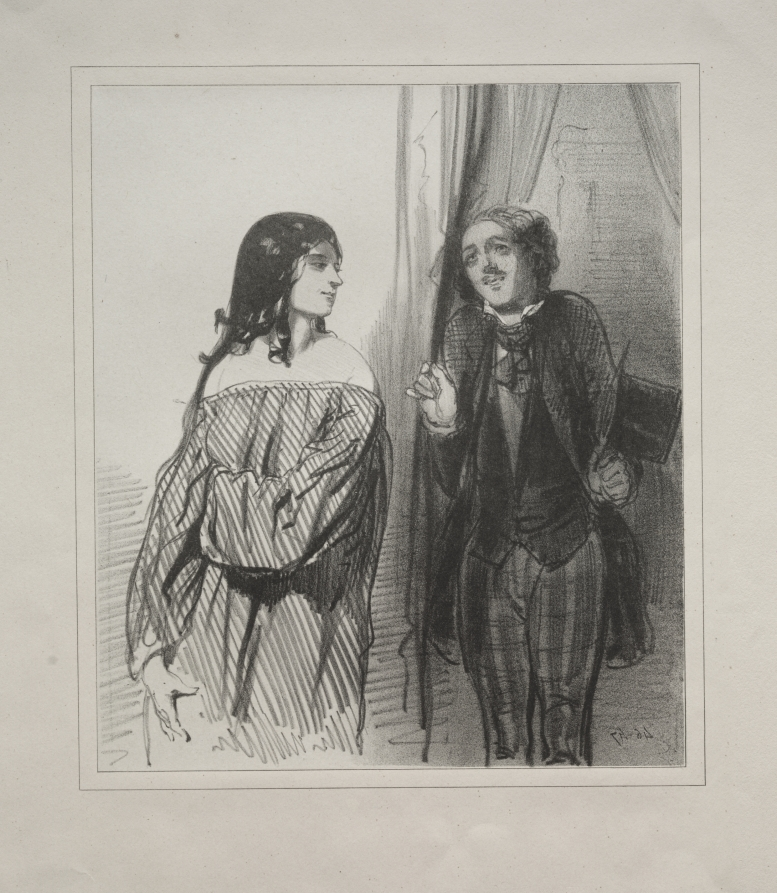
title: Baliverneries Parisiennes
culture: France, 19th century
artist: Paul Gavarni (French, 1804–1866)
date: c. 1846–47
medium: lithograph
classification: Print